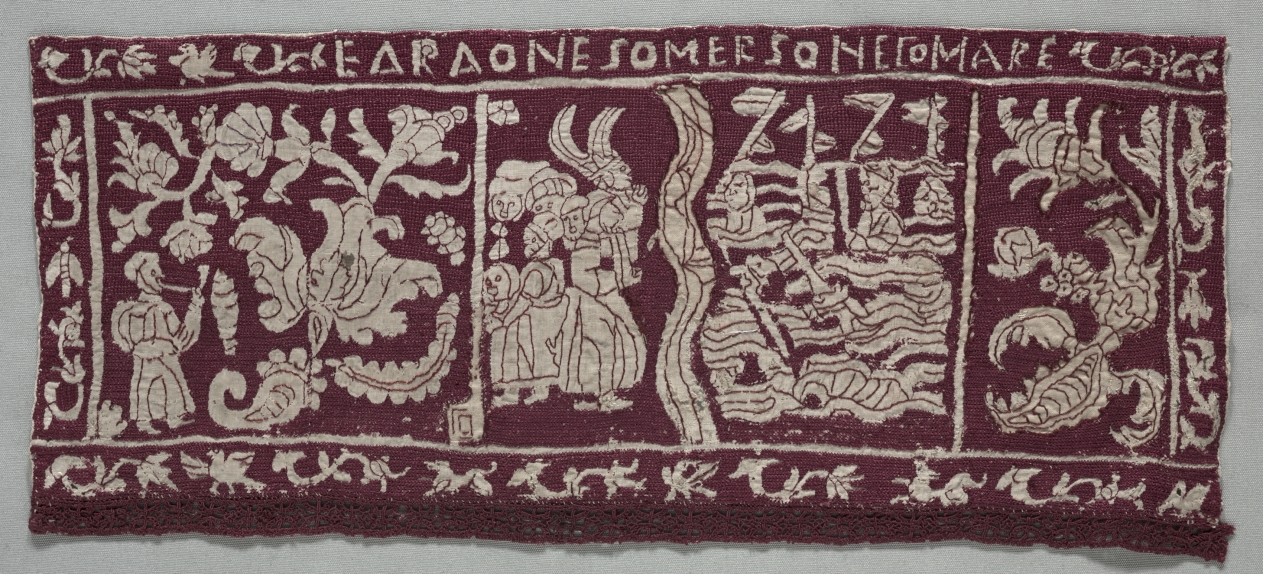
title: Embroidered Border: The Pharaoh Being Submerged in the Sea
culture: Italy, 16th-17th century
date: 1500s-1600s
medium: Plain weave linen; embroidery in silk; attached border of needle lace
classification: Embroidery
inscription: Embroidered lettering in upper margin: EARAONESOMERSONECOMARE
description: The border fragments on the left tell the story of the Israelites baking unleavened bread during the first Passover, after which they were delivered out of captivity in Egypt. In the top panel, bakers mix and knead the dough; the bottom panel shows the bakers standing on a tiled floor while placing the bread into a brick oven. This common household scene would have been familiar to Italian audiences during the Renaissance. Two fragments depict events recorded in the book of Exodus. In the top panel, the pharaoh is shown releasing the Israelites after the last plague (1939.355). In the bottom panel, he changes his mind and pursues them across the parted Red Sea, only to be swallowed up after the Israelites safely crossed (1939.352).